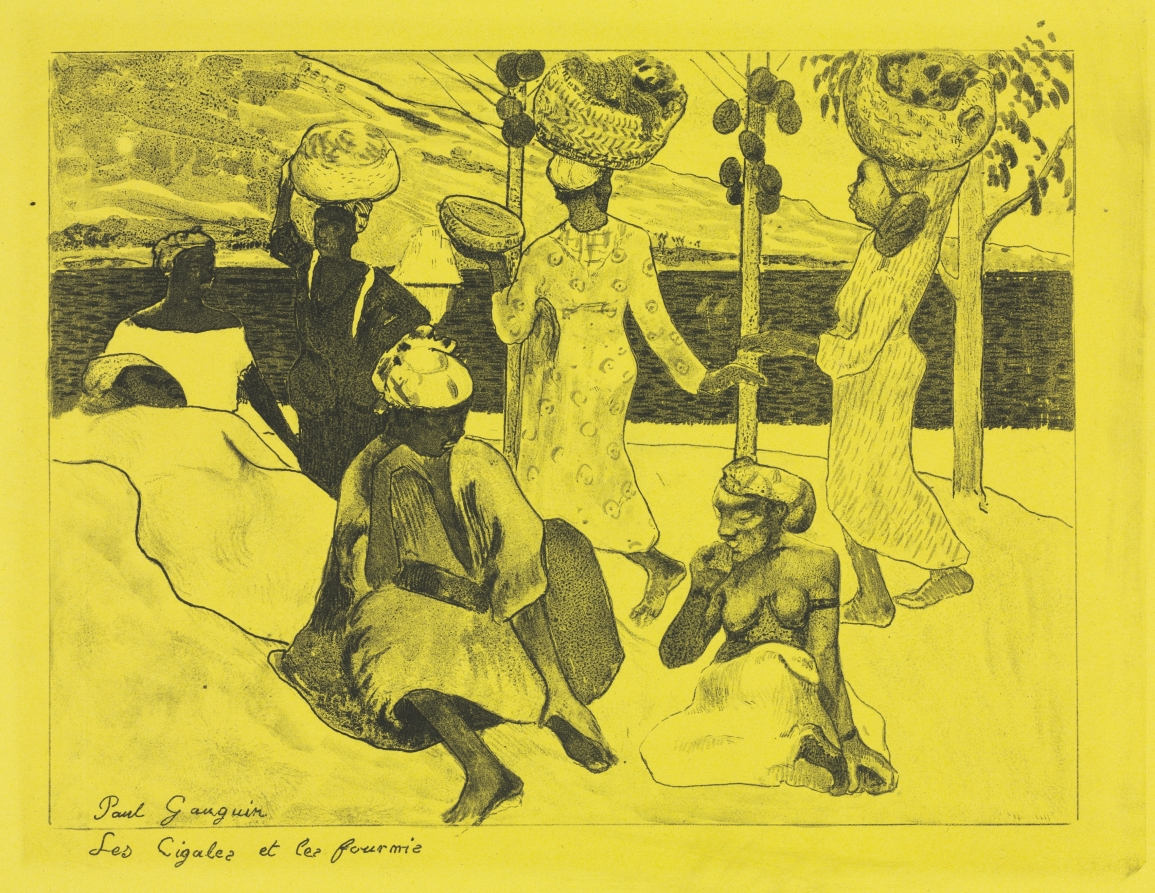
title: Volpini Suite: The Grasshoppers and the Ants (Les Cigales et les Fourmis)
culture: France, 19th century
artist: Paul Gauguin (French, 1848–1903)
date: 1889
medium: zincograph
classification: Print